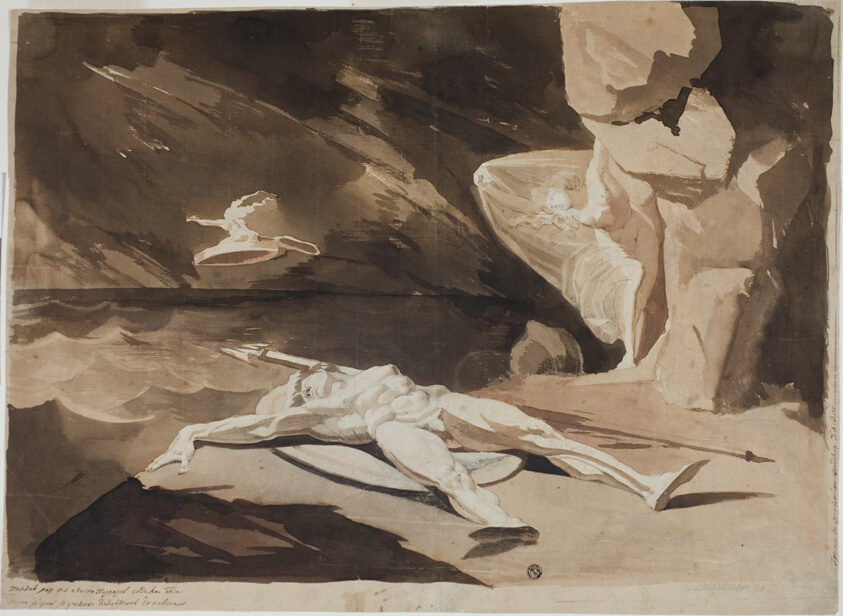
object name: Drawing and Watercolor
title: Thetis Mourning the Body of Achilles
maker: Henry Fuseli (Swiss, active in England, 1741-1825)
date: 1780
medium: Brush and brown and brownish-red wash, over graphite, on cream laid paper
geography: England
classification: ink or chalk wash; drawings (visual works); prints and drawing; paper